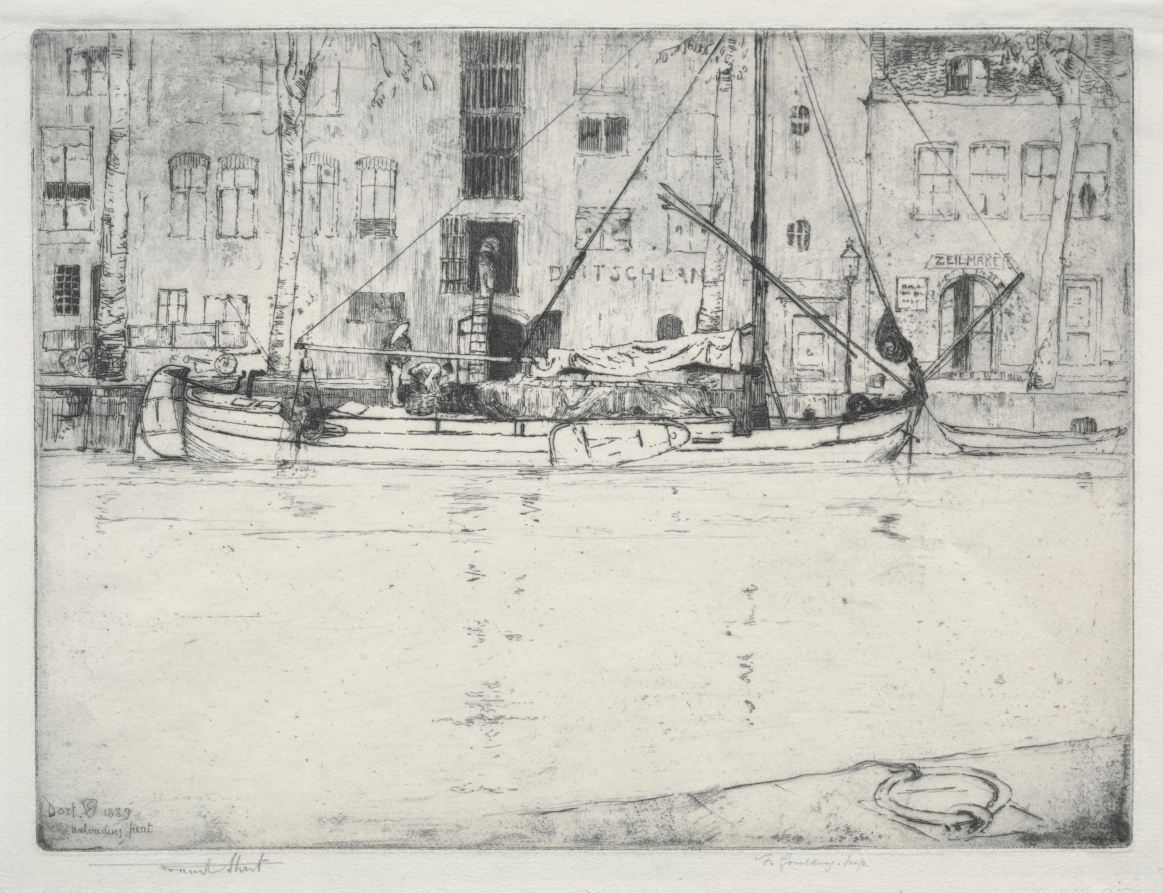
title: Unloading Peat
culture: England, late 19th Century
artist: Frank Short (British, 1857–1945)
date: 1889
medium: etching and aquatint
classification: Print